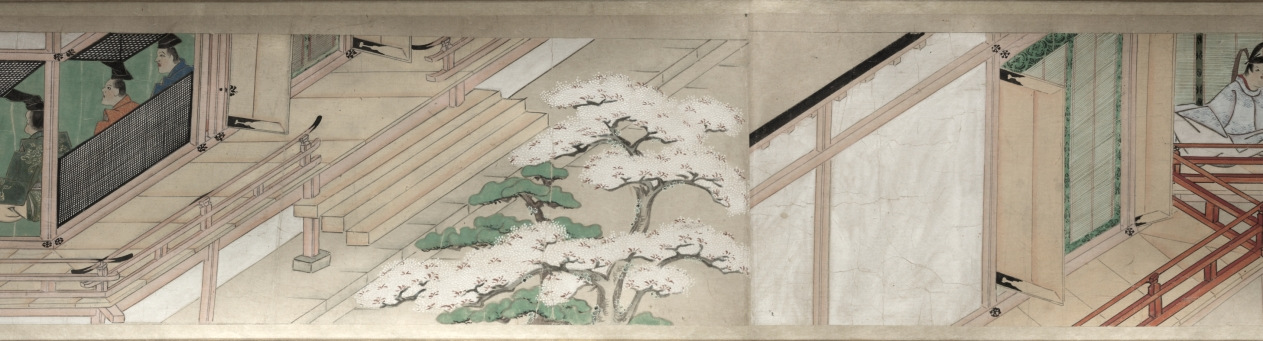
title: The Saltmaker's Story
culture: Japan, Edo period (1615–1868)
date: early 1600s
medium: One of a pair of handscrolls; ink, color, and gold on paper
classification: Painting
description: Once read and copied by girls at New Year’s celebrations and included in dowries, The Saltmaker’s Story is a rags-to-riches tale in which daughters are gifts from the gods. Despite his simple outlook, the main character progresses from humble roots as an associate at Kashima Shrine to the elite status of grandfather of the emperor through the intervention of the Kashima deity. The Saltmaker’s Story is traditionally presented in a set of three scrolls, but the text of this set has been removed by a previous owner, who remounted the illustrations as a pair. The paintings of this one take us from right to left through the second half of the tale.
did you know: This handscroll originally had texts before its paintings, but the texts were removed.